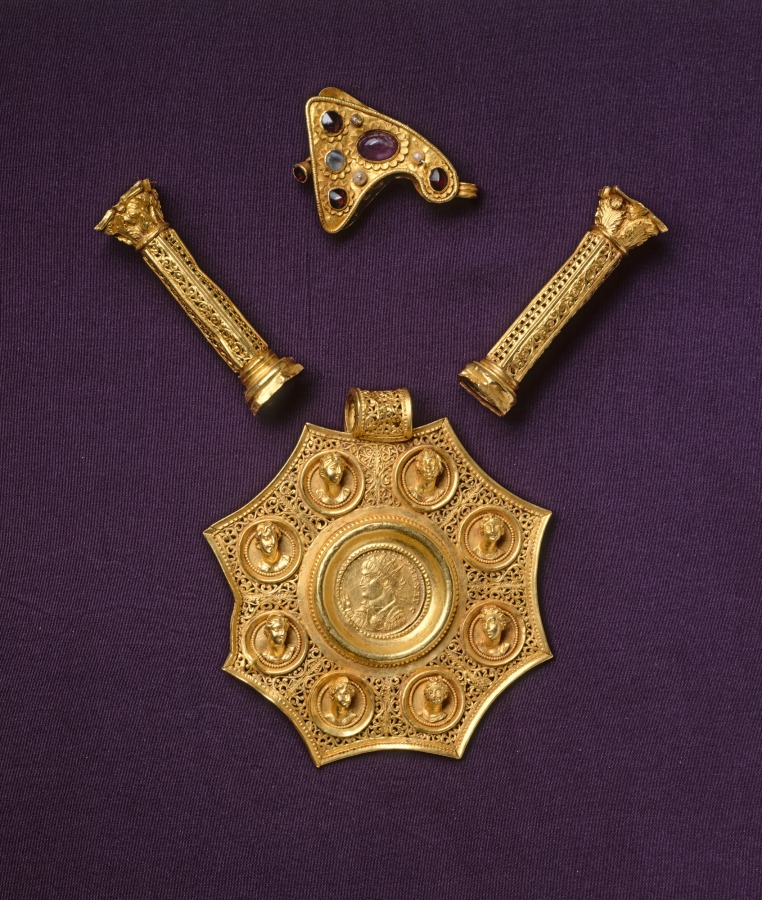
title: Octagonal Pendant with Corinthian Column Spacers and Clasp Set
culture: Byzantium, Late Roman, Eastern Mediterranean, (probably Sirium or Nicomedia), Byzantine period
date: 324–26 CE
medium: gold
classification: Jewelry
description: Mounted at the center of this octagonal pendant is a rare coin issued by Constantine the Great, the Roman Empire’s first Christian emperor. Constantine’s portrait appears on the coin’s front, those of two of his sons on the back. Constantine’s image is surrounded by male and female busts, some of which are mythological figures. The pendant once formed the centerpiece of a sumptuous gold necklace, likely a gift for a high-ranking court official or member of the imperial family. This larger necklace is thought to have included four additional coin-set pendants—two hexagonal and two circular, now in Washington, DC (Dumbarton Oaks), London (British Museum), and Paris (Musée du Louvre).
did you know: Using the opus interrasile openwork technique, a goldsmith delicately punched and filed hundreds of tiny holes to create the intricate filigree pattern on this pendant.